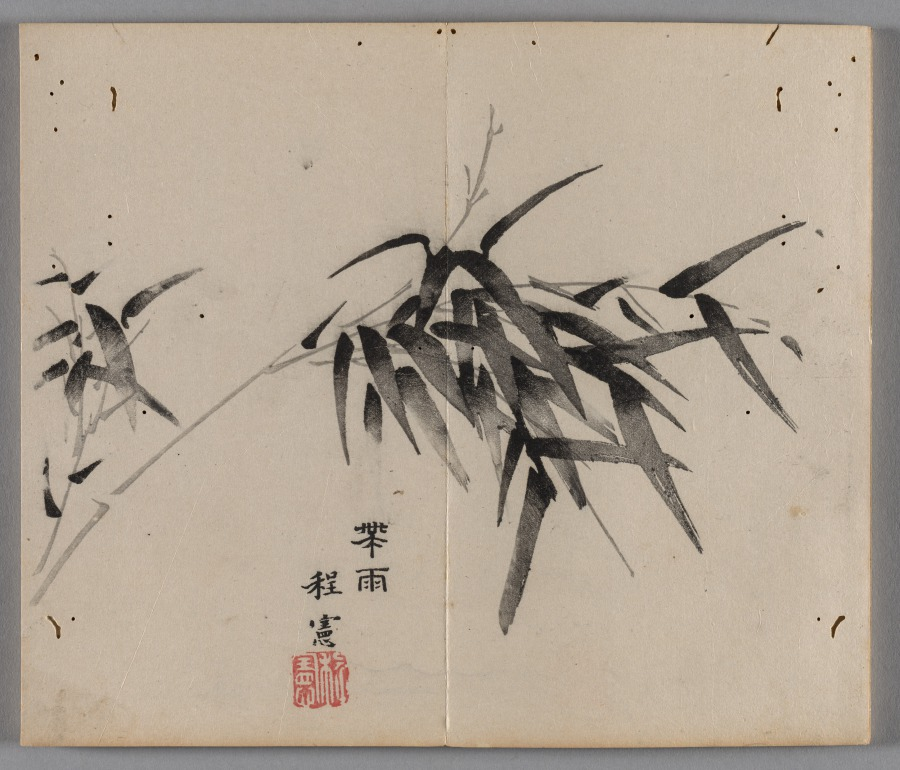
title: Ten Bamboo Studio Painting and Calligraphy Handbook (Shizhuzhai shuhua pu): Bamboo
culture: China, Qing dynasty (1644-1911)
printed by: Hu Zhengyan (Chinese, c. 1584–1674)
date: 1633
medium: Woodblock-printed book; ink and colors on paper; first edition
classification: Print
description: Color printing reached a level of perfection in the early 1600s, as seen in this Ten Bamboo Studio Collection of Calligraphy and Painting and the Mustard Seed Garden Manual of Painting (printed 1679 and 1701). The painterly quality, precision in registering (aligning) the woodblocks, and harmonious colors made them the most successful color print editions in Chinese history. Both editions were printed and compiled in Nanjing, spread nationwide, and had a great impact on the arts in Japan and Korea.